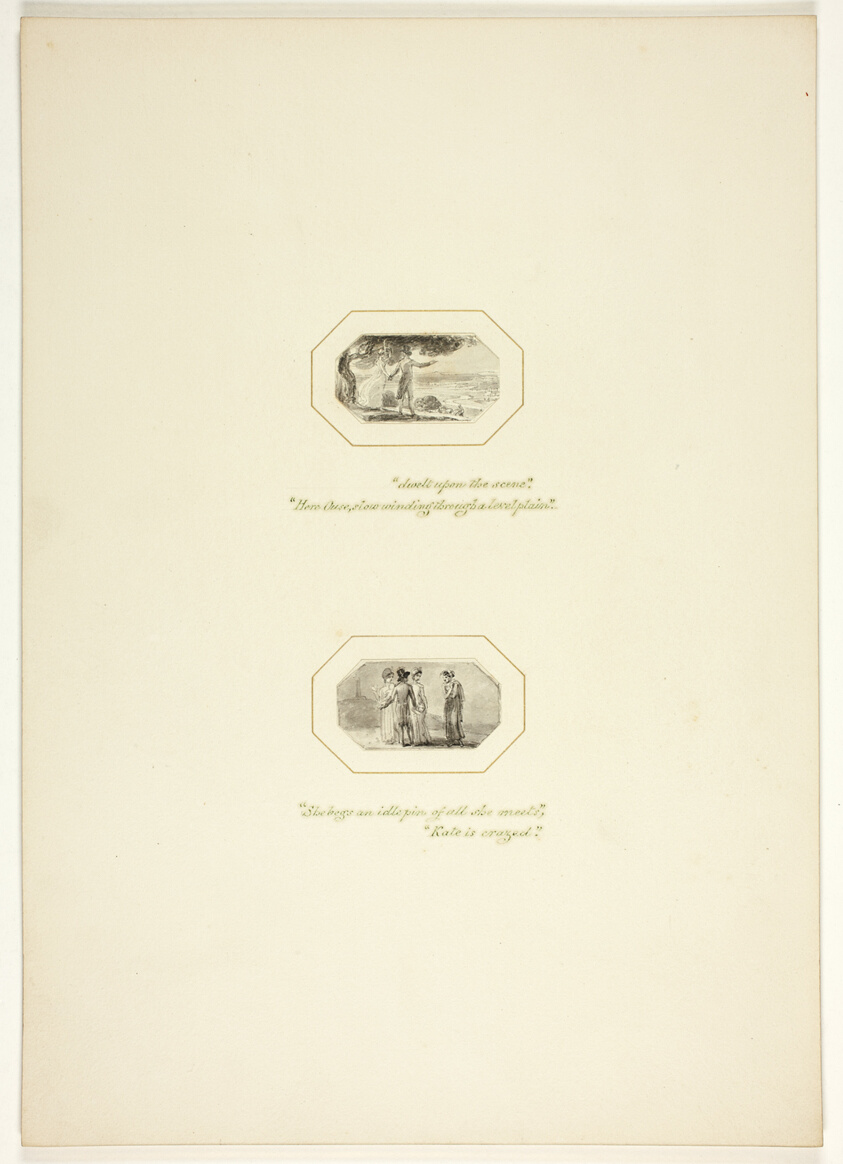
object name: Drawing and Watercolor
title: Study for a plate from The Task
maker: Thomas Stothard (English, 1755-1834)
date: c. 1800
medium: Ink wash on paper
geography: England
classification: ink or chalk wash; drawings (visual works); prints and drawing